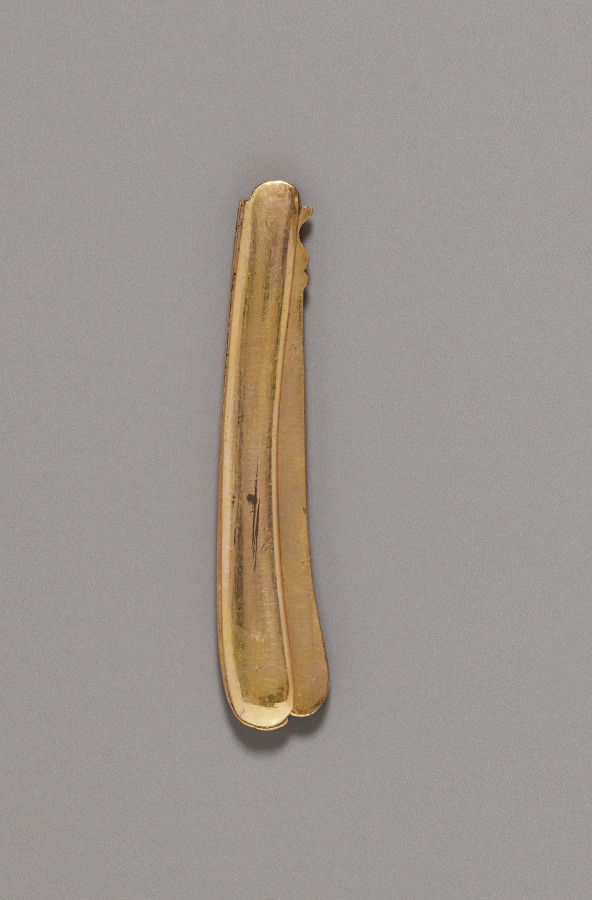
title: Sharpening Blade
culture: England, 18th century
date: c. 1770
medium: gilt metal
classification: Miscellaneous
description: Luxurious personal objects were an essential part of a privileged wardrobe during the 1700s and early 1800s, emphasizing their owner’s refinement and wealth. Especially popular were étuis, small ornamented cases containing miniature sewing, writing, or grooming implements that hung at a woman’s waist from an ornate clasp, known as a chatelaine. Despite its glittering surface, this small expensive set disguised a system based on the labor and suffering of enslaved or indentured people, whether in gold and stone mines or the shop where it was made.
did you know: Stored inside this case are grooming and writing instruments such as a clasp knife, scissors, an ivory tablet, a pencil, a threading needle used for lacing corsets, and an ear scoop.